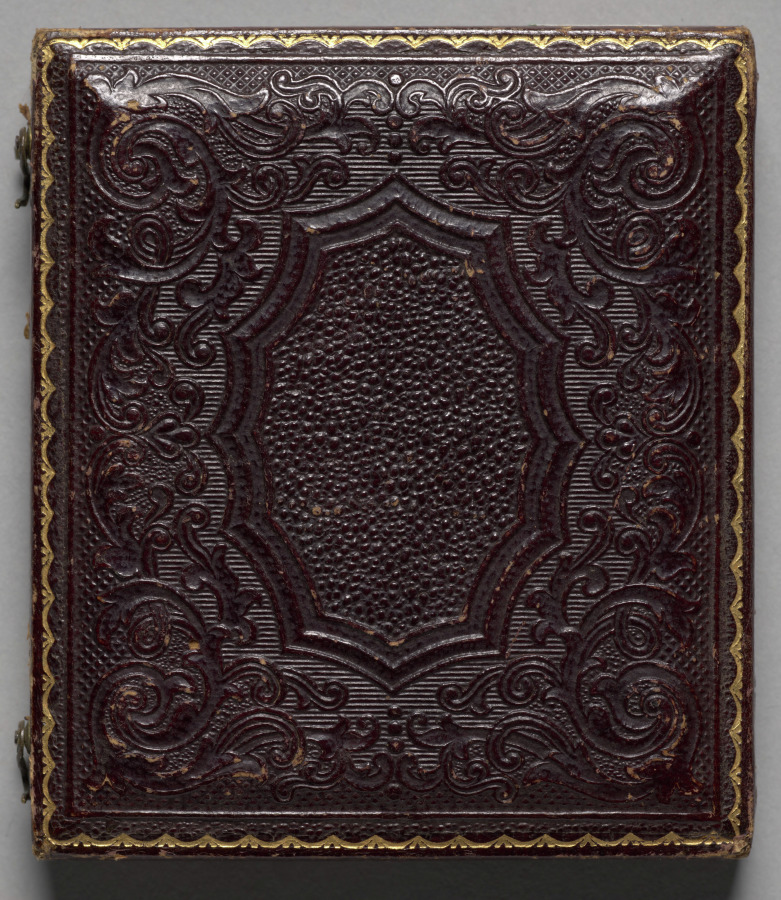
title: Urban Worker Smoking Tyrolean Pipe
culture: America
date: c. 1855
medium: ambrotype, sixth plate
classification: Photograph